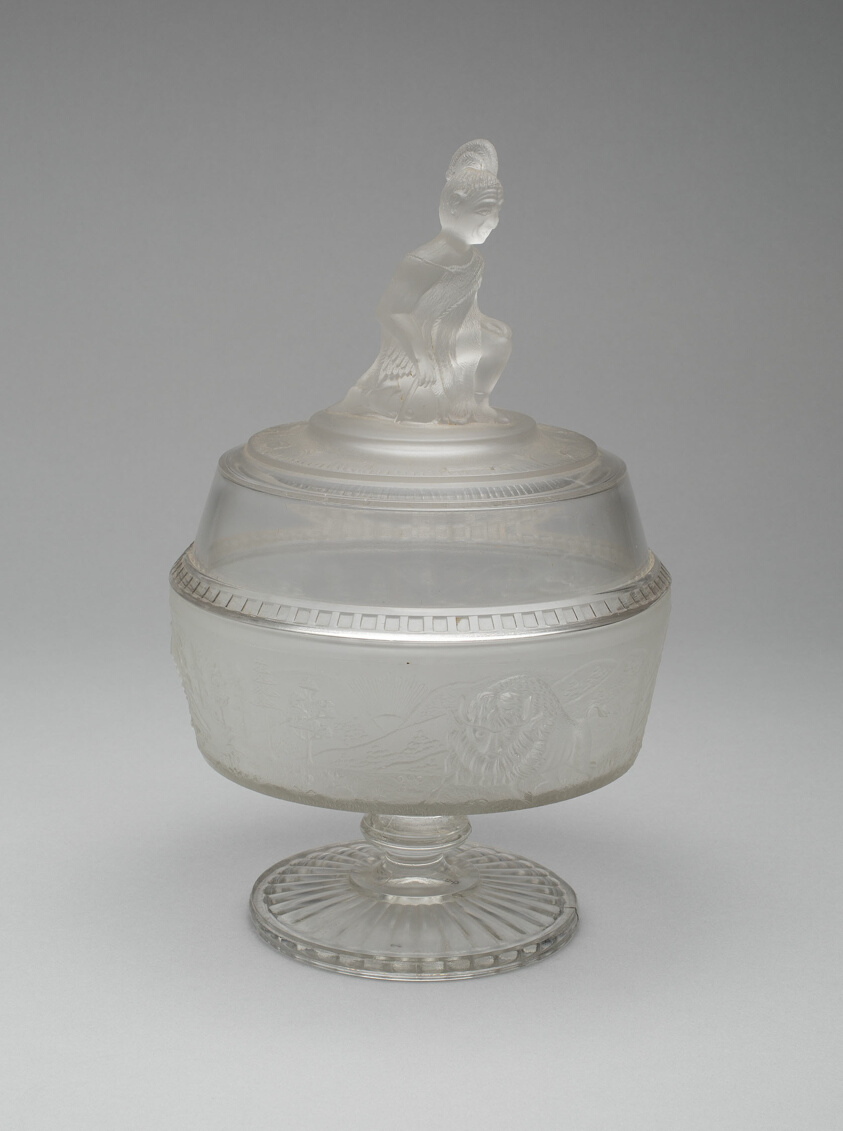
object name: Glass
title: "Westward Ho!/Pioneer" pattern covered footed compote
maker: Gillinder and Sons, 1861–c. 1930; Philadelphia or Greenbsburg, Pennsylvania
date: c. 1876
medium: Glass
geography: Philadelphia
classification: compote; glass; vessel for serving food; american decorative arts; american arts; decorative arts